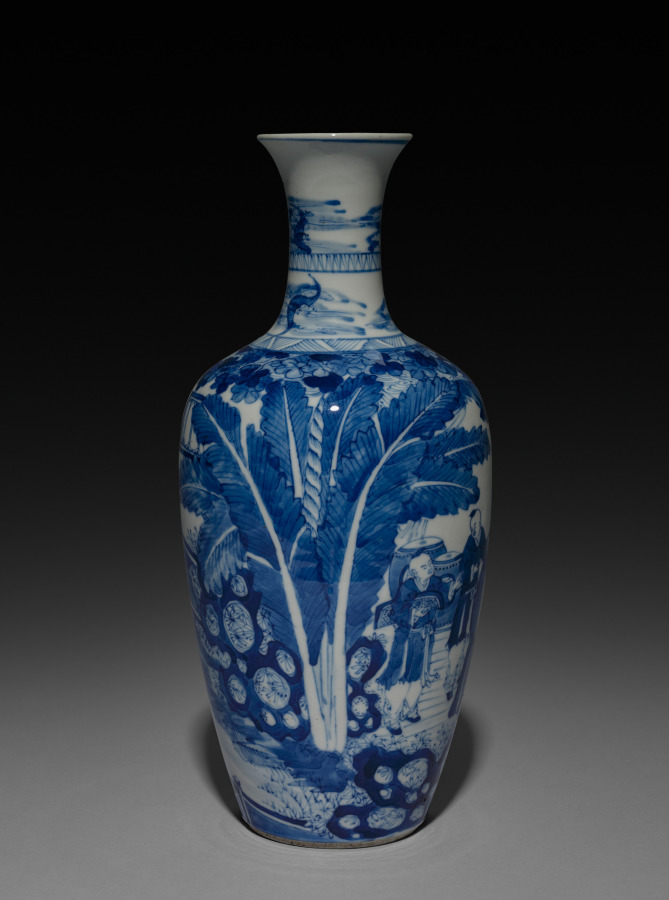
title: Vase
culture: China, Qing dynasty (1644-1911), Kangxi reign (1661-1722)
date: 1662–1722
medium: porcelain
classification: Ceramic